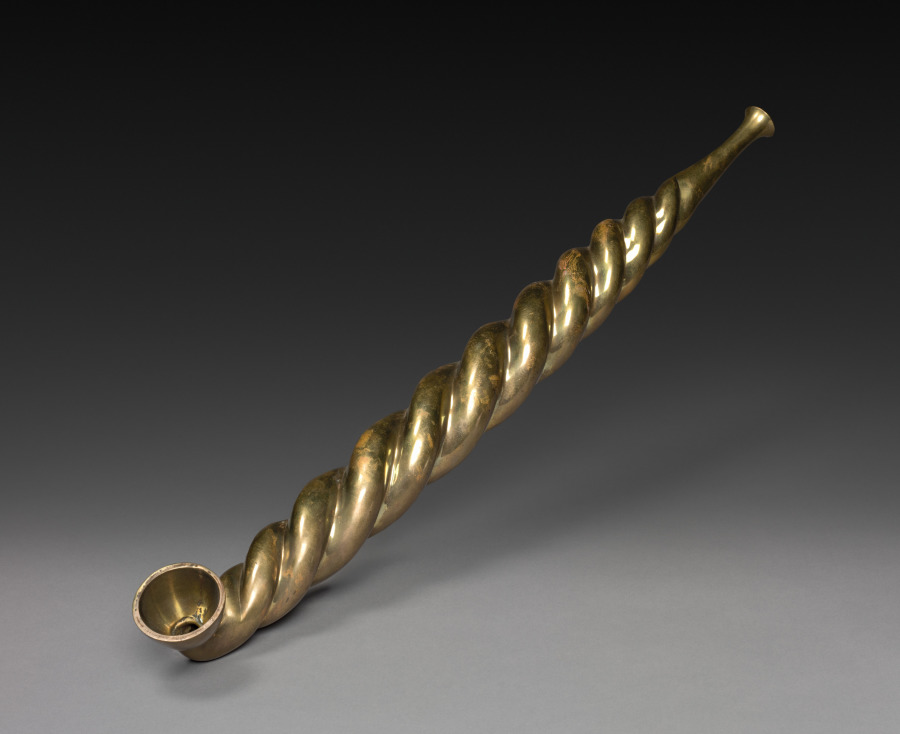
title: Tobacco Pipe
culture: Japan, Edo period (1615–1868)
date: early to mid-1800s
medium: brass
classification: Miscellaneous